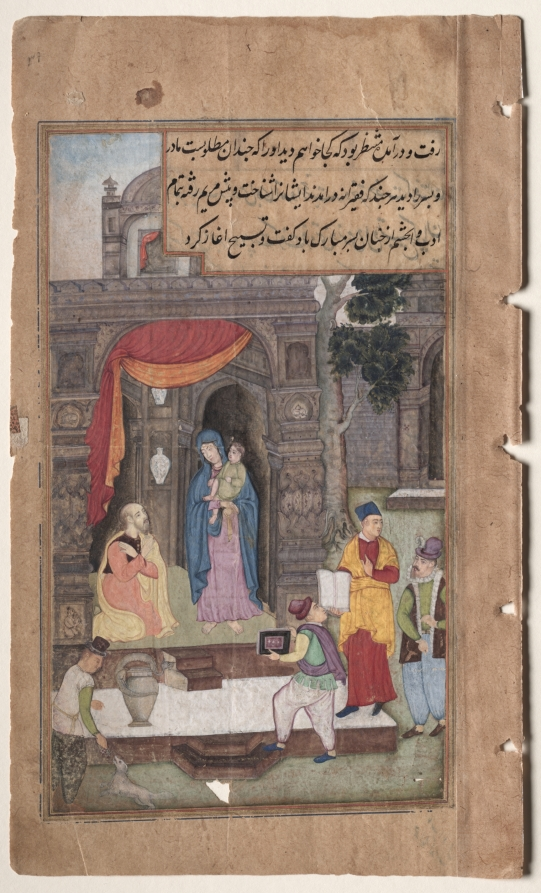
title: Simeon Kneels in Front of Mary and Jesus after Recognizing Them (folio 40 recto), from a Mirror of Holiness (Mir’at al-quds) of Father Jerome Xavier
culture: Mughal India, Allahabad, made for Prince Salim (1569–1627)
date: 1602–4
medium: Gum tempera, ink, and gold on paper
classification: Manuscript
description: Simeon had heard a prophecy that he would encounter the Messiah with his mother in the temple at Jerusalem. This painting depicts his moment of recognition that the prophecy had come true. The temple is populated by Jewish teachers and scholars, and a number of unusual visual elements. A dragon-headed vase is set by the stairs, and niches for vases flank the entrance, possibly in reference to Mary’s status as a vessel for the divine. The form of the temple itself seems to be an imaginative combination of Hindu temple architecture and a Mughal palace.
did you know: A man in the lower left offers grapes to a dog.